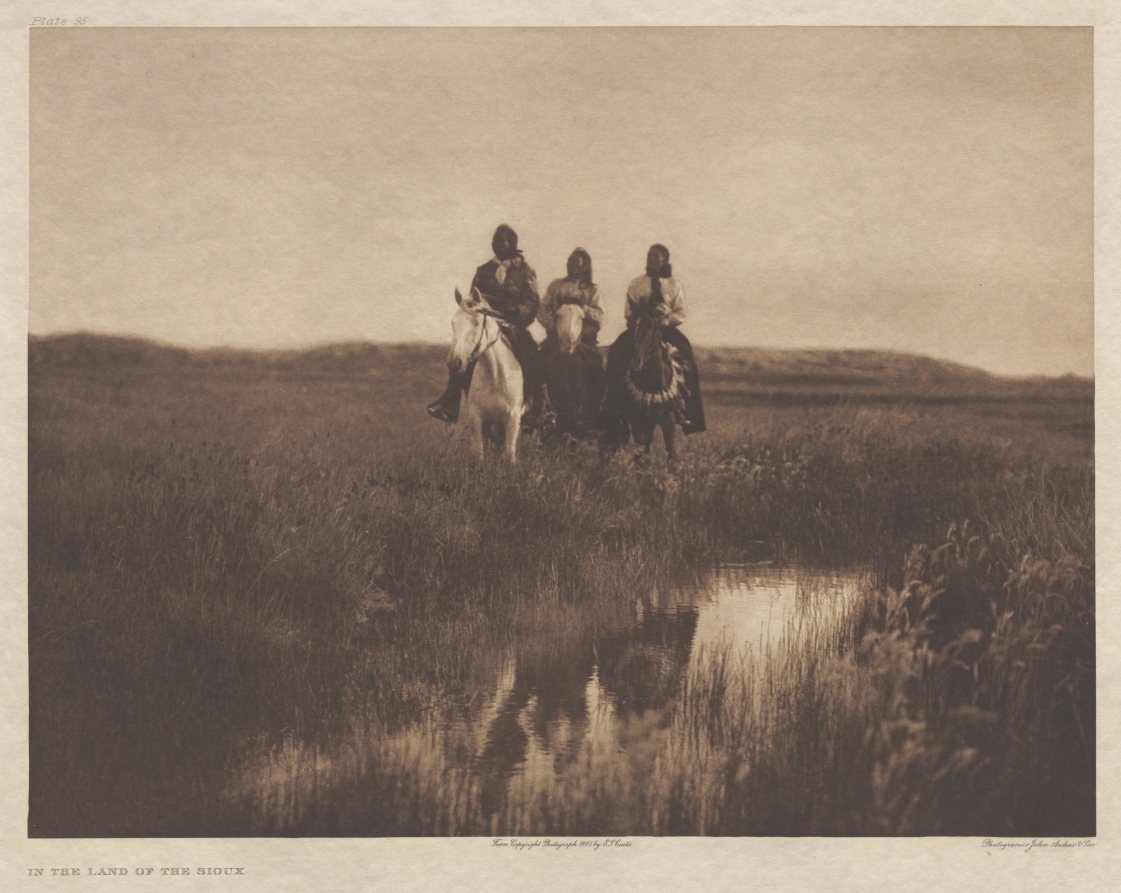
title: Portfolio III, Plate 95: In the Land of the Sioux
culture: America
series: The North American Indian: being a series of Portfolios picturing and describing the Indians of the United States, the Dominion of Canada, and Alaska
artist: Edward S. Curtis (American, 1868–1952)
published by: The University Press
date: 1905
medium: photogravure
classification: Portfolio